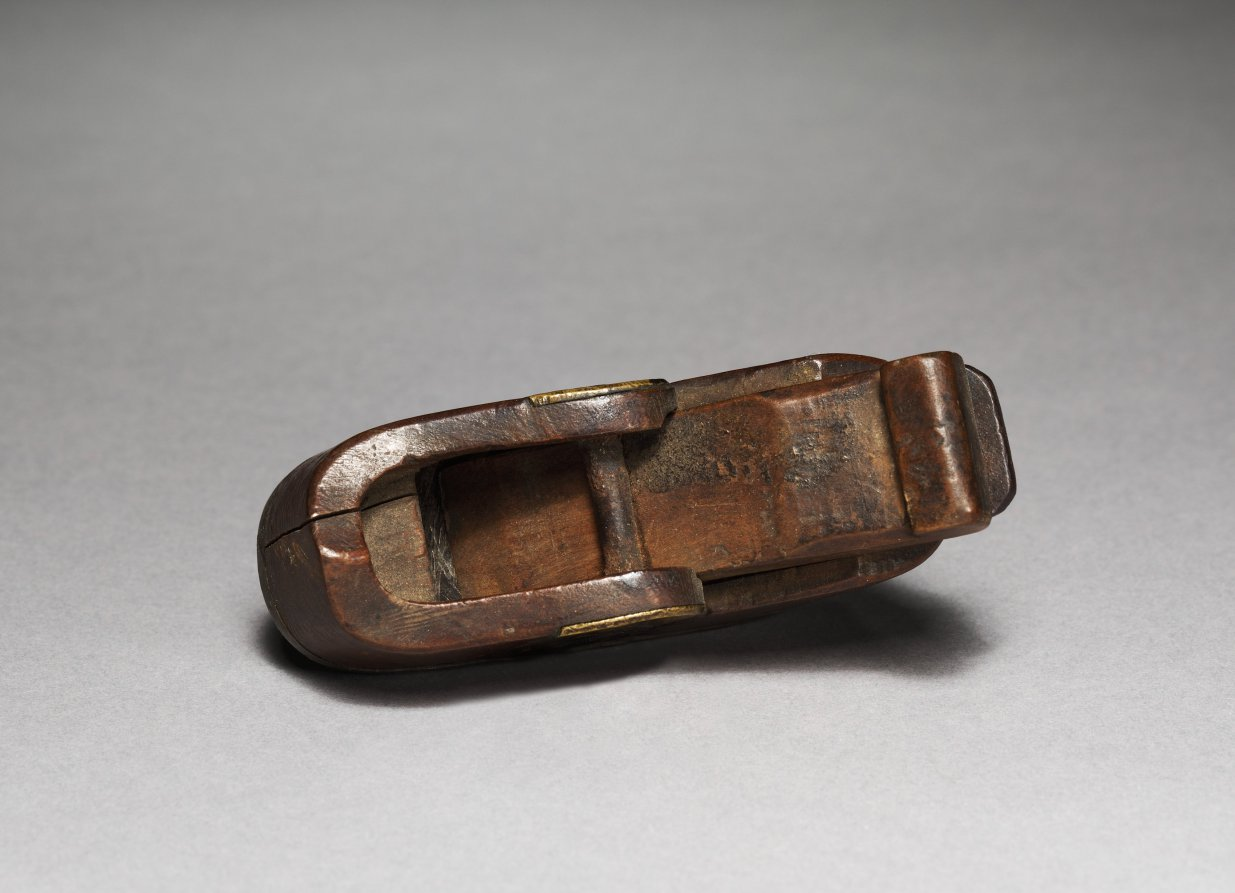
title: Plane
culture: Europe, 18th century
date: 1700s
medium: wood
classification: Tool